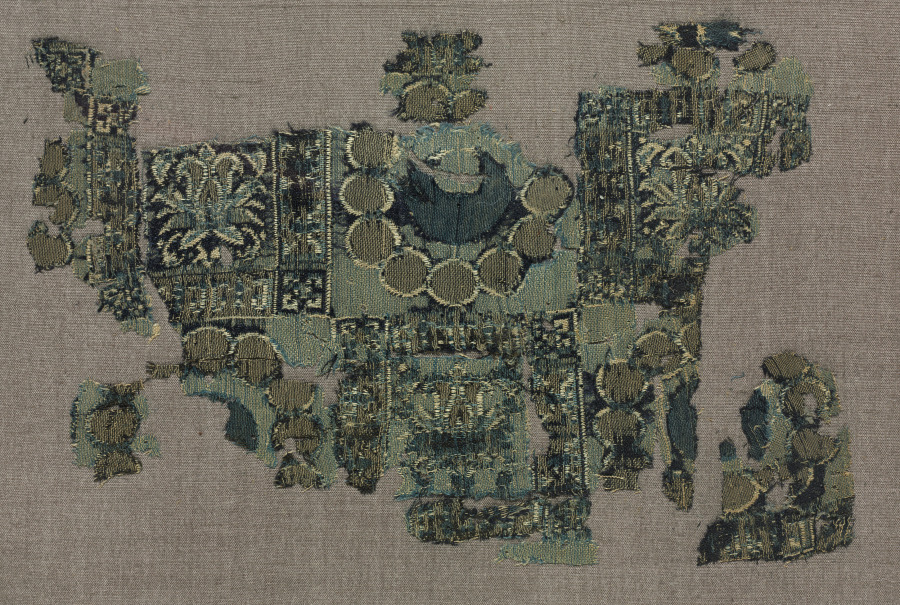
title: Fragment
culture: Egypt or Syria, Mamluk period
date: 1300s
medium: double cloth, tabby weave; silk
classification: Textile